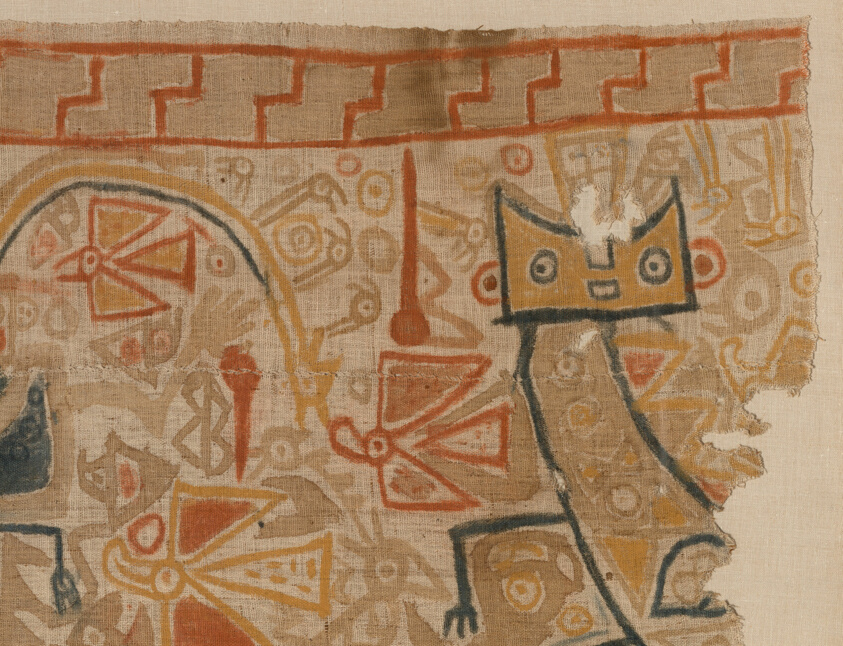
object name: Textile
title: Painted Textile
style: chimú capac, Arts of the Americas, andean, peruvian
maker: Probably Chimu Capac, Supe Valley, north coast, Peru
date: c. 1000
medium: Cotton, plain weave; painted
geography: Peruvian North Coast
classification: textile; cotton; art of the americas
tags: figures (representations), feline, birds, waves, serpents